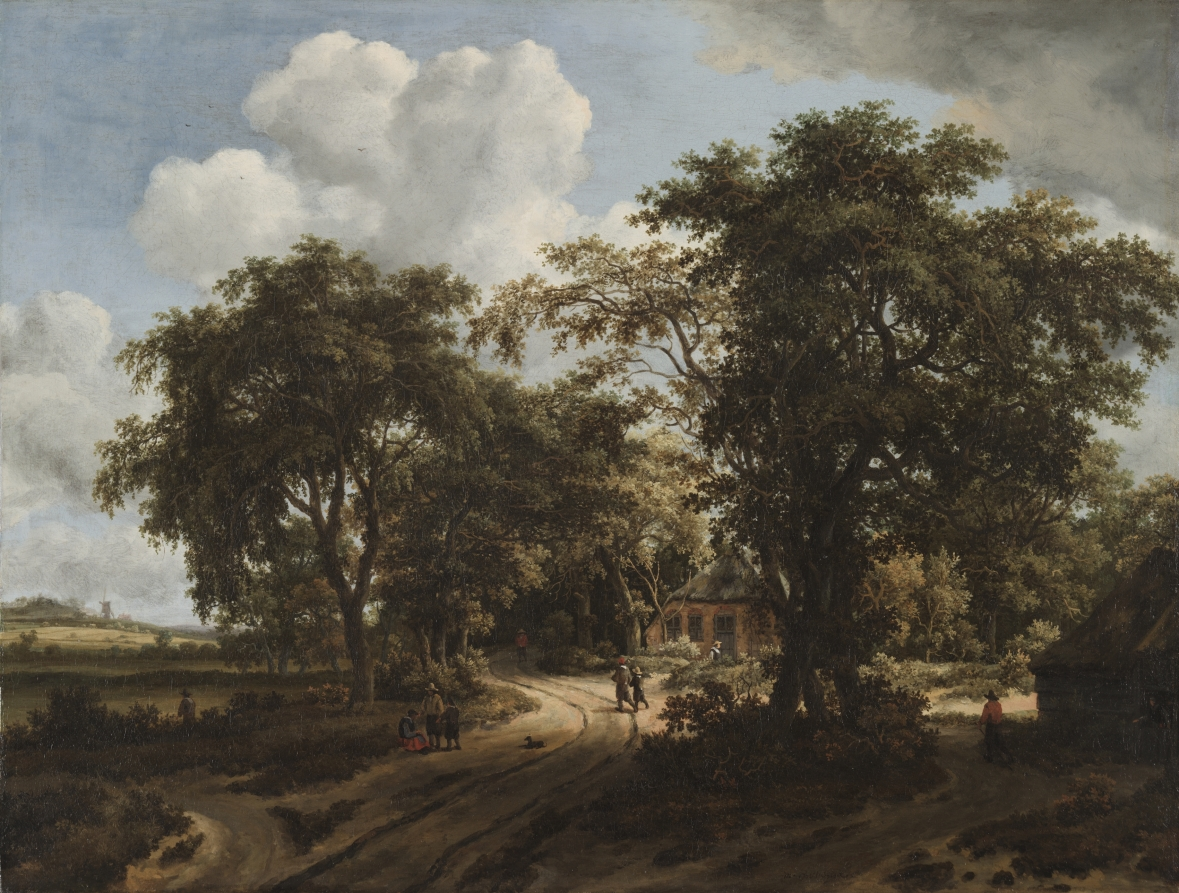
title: A Cottage in the Woods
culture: Netherlands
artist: Meindert Hobbema (Dutch, 1638–1709)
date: c. 1662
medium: oil on canvas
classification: Painting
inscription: Signed lower left: "m. hobbema"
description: Inspired by the native Dutch landscape, Meindert Hobbema specialized in scenes of dense forest growth punctured by winding paths and views toward sunlit clearings that beckon with fertile fields and rustic cottages. Hobbema’s paintings were especially popular among Dutch citizens, who took enormous pride in their land. In addition to nationalistic pride in having recently gained independence from Spain, there was also a profound awareness of the preciousness of land in a low-lying nation, which required dikes, pumps, and constant vigilance to guard against flooding. While the Dutch earned much of their considerable wealth from sea trade, agriculture and livestock were important sources of prosperity.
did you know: A windmill, an important symbol of Dutch identity, can be found in the background of this painting.